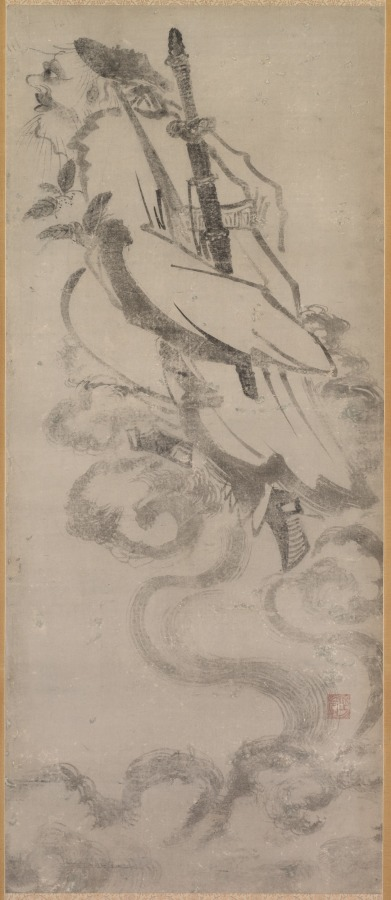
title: The Ascending Daoist Immortal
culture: Japan, Edo period (1615–1868)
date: 1700s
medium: hanging scroll; ink on paper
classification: Painting